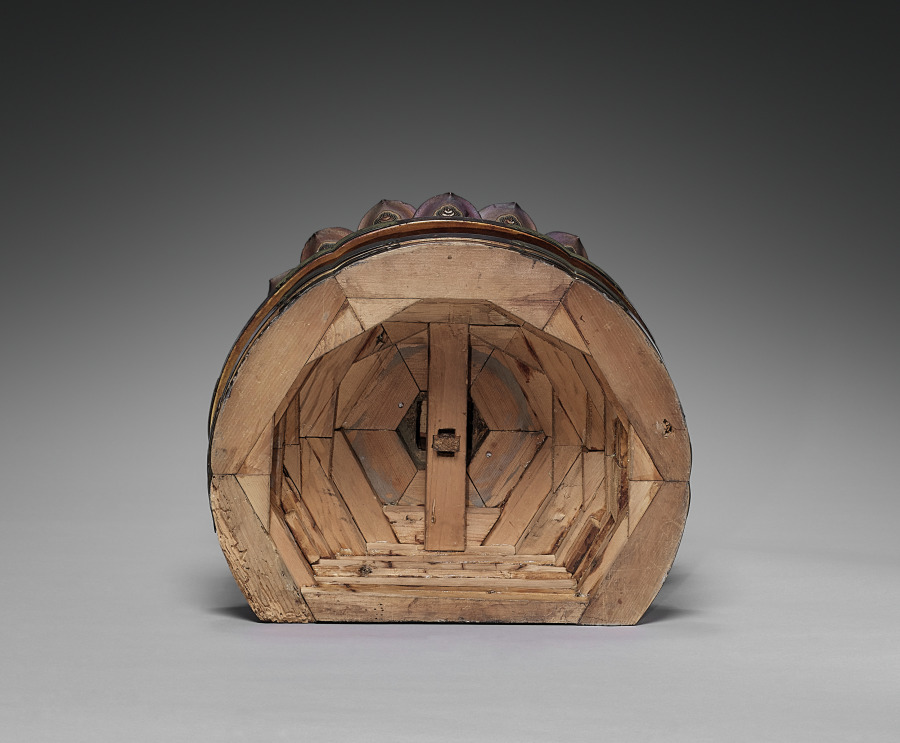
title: Batō (Horse-Headed) Kannon (base)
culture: Japan, Edo period (1615–1868)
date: 1600s–1700s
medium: wood with lacquer, color, and gold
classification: Sculpture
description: Batō Kannon, or Hayagriva Avalokiteshvara in Sanskrit, is the “horse-headed” form of the bodhisattva of compassion, who presides over the realm of animals in the Buddhist Six Realms of Transmigration (rebirth). A horse’s head appears in the hair of this sculpture to identify it. Bodhisattvas are beings who, though enlightened, choose to remain within the worlds of existence to help others. The six realms are heaven, hell, human, animal, hungry ghost, and ashura, or fierce supernatural entities.